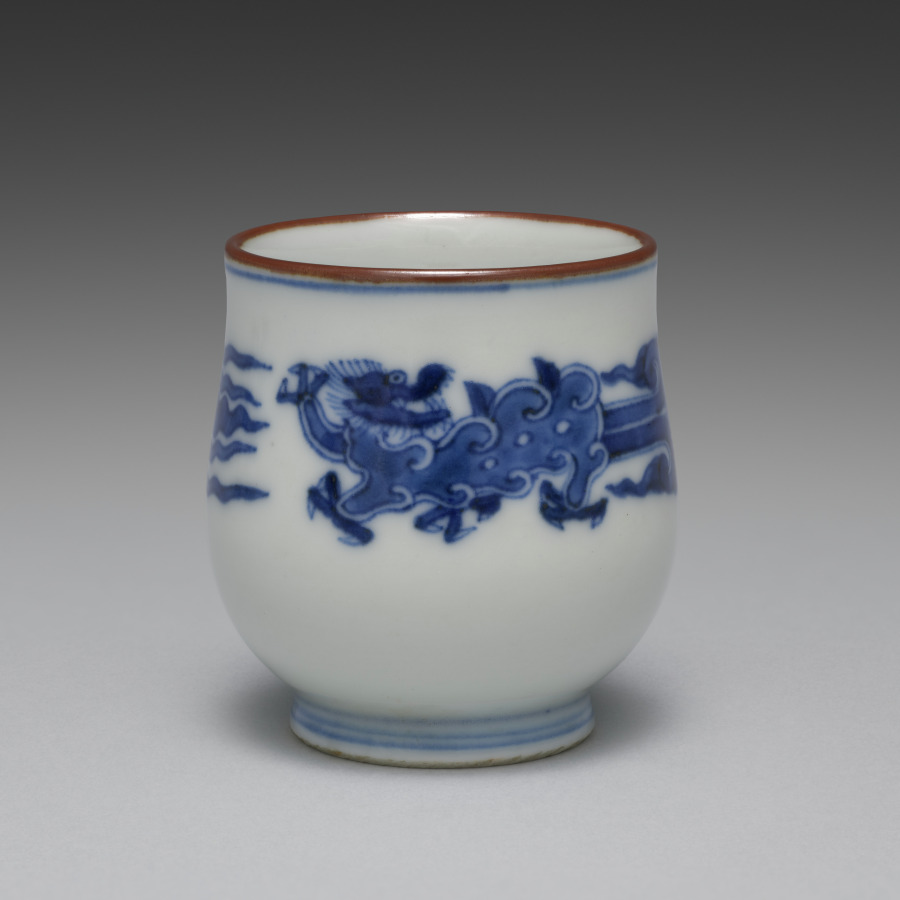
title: Cup from Sake Cups with Dragons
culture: Japan, Meiji period (1868–1912)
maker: Seifū Yohei III (Japanese, 1851–1914)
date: c. 1893–1914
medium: One from a set of six sake cups; porcelain with underglaze blue and iron oxide rims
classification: Ceramic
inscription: 大日本清風造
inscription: 清風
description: Each of these sake cups pictures two backward-looking dragons. The highly stylized creatures resemble jade carvings.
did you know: Seifū Yohei III was inspired by the Chinese mythical animals that were common on porcelain objects made at Jingdezhen in China during the Ming dynasty (1368–1644) and then exported around the world.